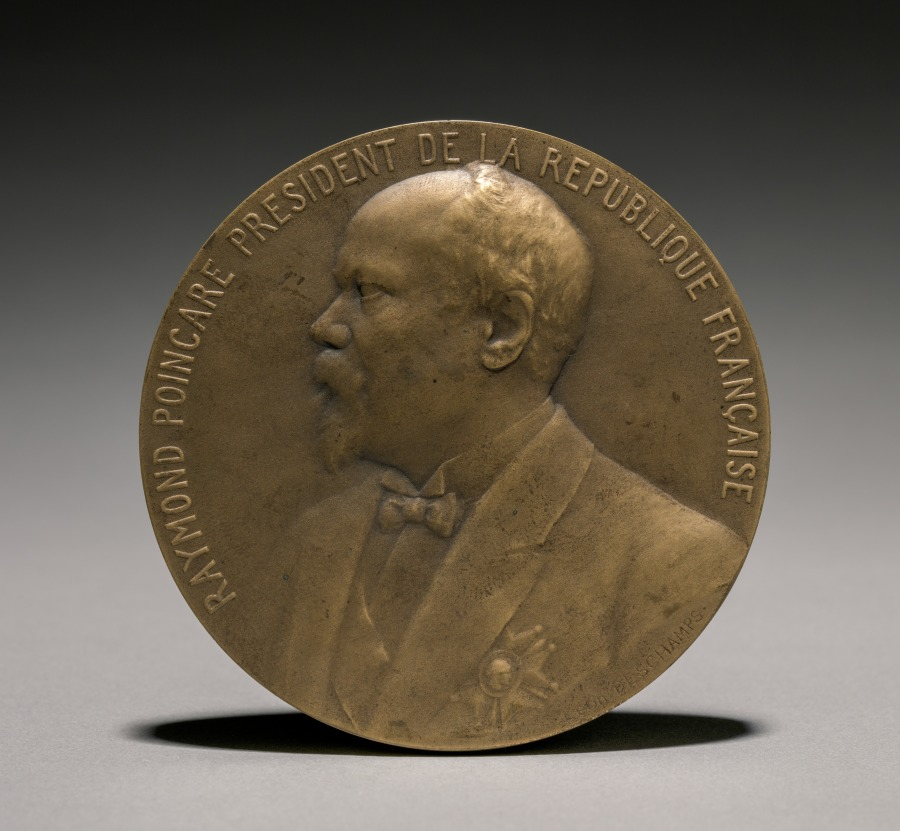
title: Poincarè Medal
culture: France, 20th century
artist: Léon Julien Deschamps (French, 1860–1928)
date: 1900s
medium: bronze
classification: Metalwork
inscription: obverse - "Raymond Poincarè President de la Republique Francaise." reverse - woman holding book on which is inscribed: "Poincarè President de la Republique Francaise"; above: "Elu par l'assemblee nationale le XVII Janvier MCMXIII."